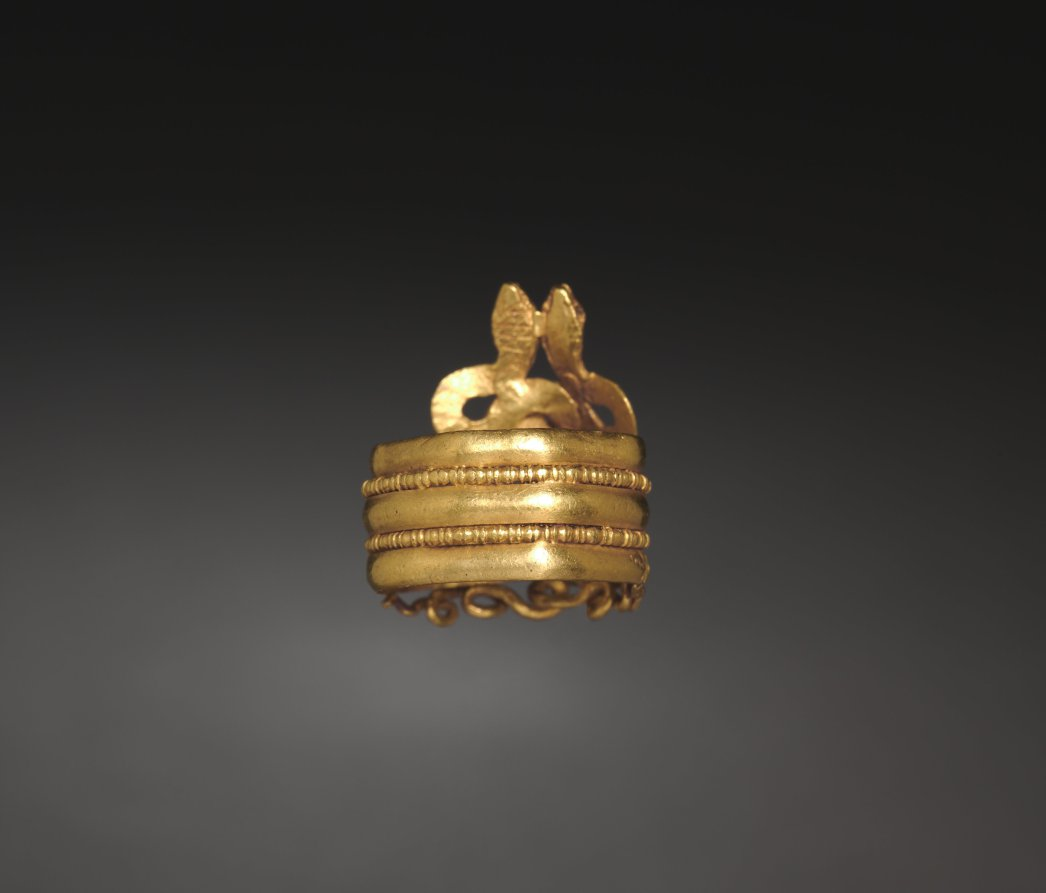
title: Ring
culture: Greece or Italy, Rome (?)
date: 1–100 CE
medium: gold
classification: Jewelry